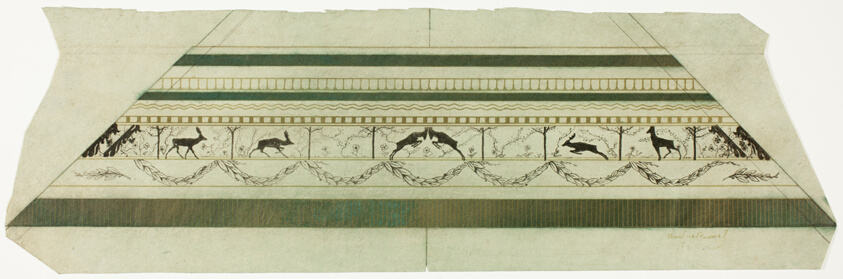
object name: Print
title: Stag and Flower Pattern Frame (bottom frame section)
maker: Theodore Roussel (French, worked in England, 1847-1926)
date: 1897–99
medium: Etching and soft ground in black, yellow-brown metallic, and green-blue with plate tone, on ivory Japanese paper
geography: England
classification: etching; paper; print; prints and drawing